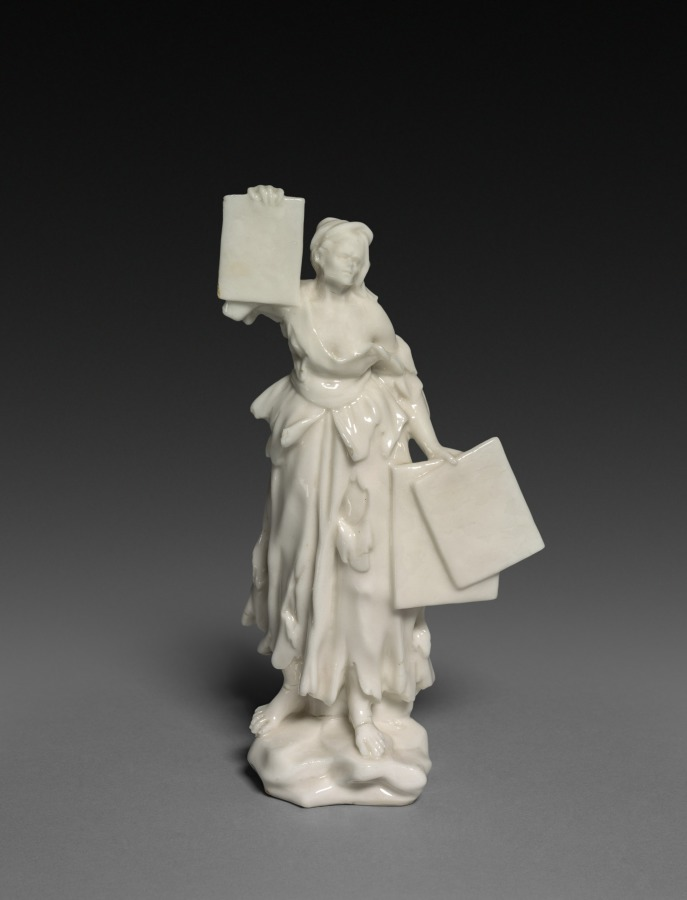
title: Print Seller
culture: Italy, Naples, Capo di Monte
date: c. 1750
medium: porcelain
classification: Ceramic